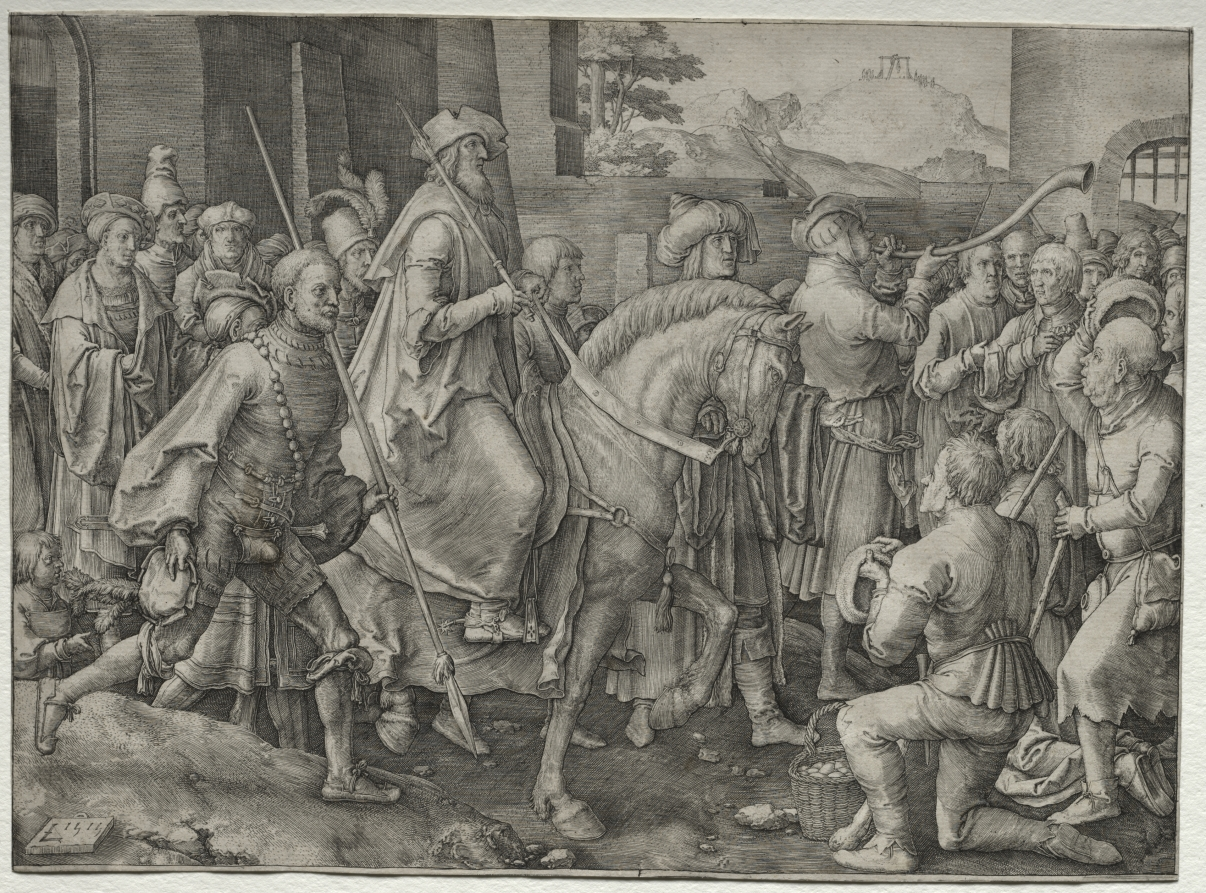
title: The Triumph of Mordecai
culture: Netherlands, 16th century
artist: Lucas van Leyden (Netherlandish, 1494–about 1533)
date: 1515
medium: engraving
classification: Print